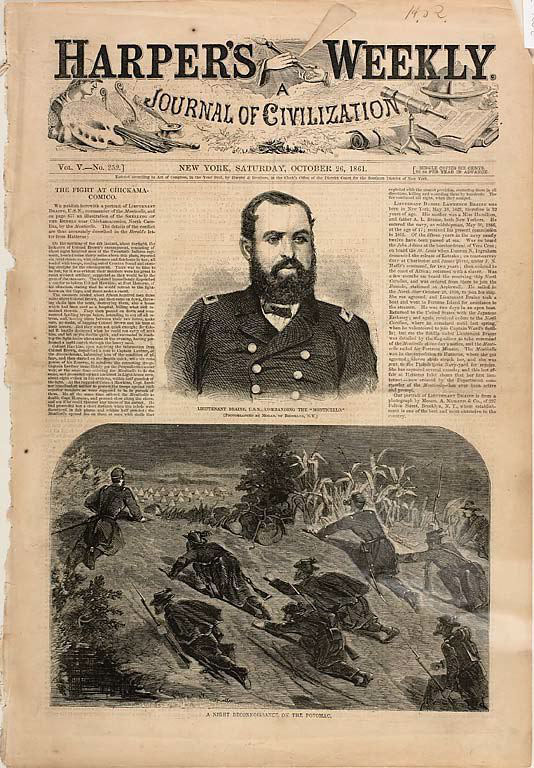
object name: Print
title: A Night Reconnaissance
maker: Winslow Homer (American, 1836-1910); published by Harper's Weekly (American, 1857-1916)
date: published October 26, 1861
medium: Wood engraving on paper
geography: United States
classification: wood engraving; print; prints and drawing